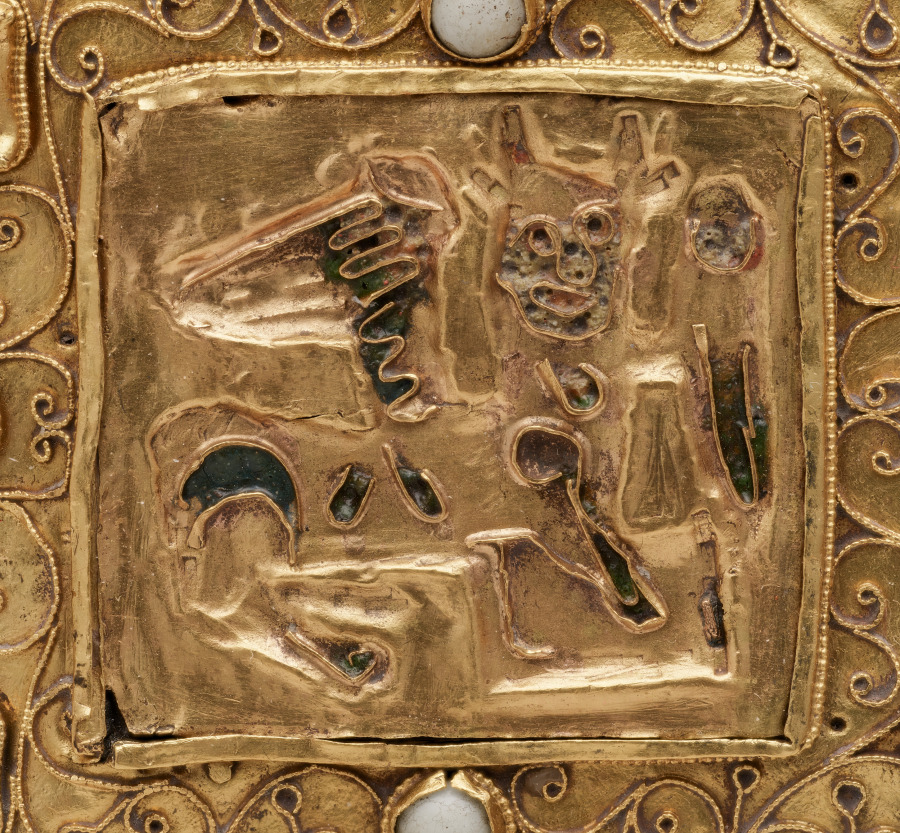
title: Ceremonial Cross of Countess Gertrude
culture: Germany, Lower Saxony?, 11th century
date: 1038 or shortly after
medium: gold: worked in repoussé; cloisonné enamel, intaglio gems, pearls, wood core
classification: Metalwork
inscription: translation of inscription on back: For the Relics of the Holy Apostle Peter and the Holy Virgin Liutrudis, Countess Gertrude Ordered this made.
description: This precious gold cross was commissioned by Countess Gertrude (died 1077) and given to the church of Saint Blaise following the death of her husband, Count Liudolf of Brunswick (died 1038). The cross was intended to be carried in liturgical processions or to be placed on a church altar. The inclusion of relics within the crosses endowed them with an additional role as devotional objects. At the center of the four cross arms, fine but much damaged cloisonné enamel plaques represent the symbols of the four Evangelists--an eagle for Saint John (above); a lion for Saint Mark (on the left); an ox for Saint Luke (on the right); and an angel for Saint Matthew (below). Pearls and precious and semiprecious stones are set within an intricate network of gold filigree while a large sapphire, inscribed in a circle and likewise surrounded by pearls and precious stones, is placed at the crossing.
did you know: Countess Gertrude's name appears on the back of the cross at the bottom.